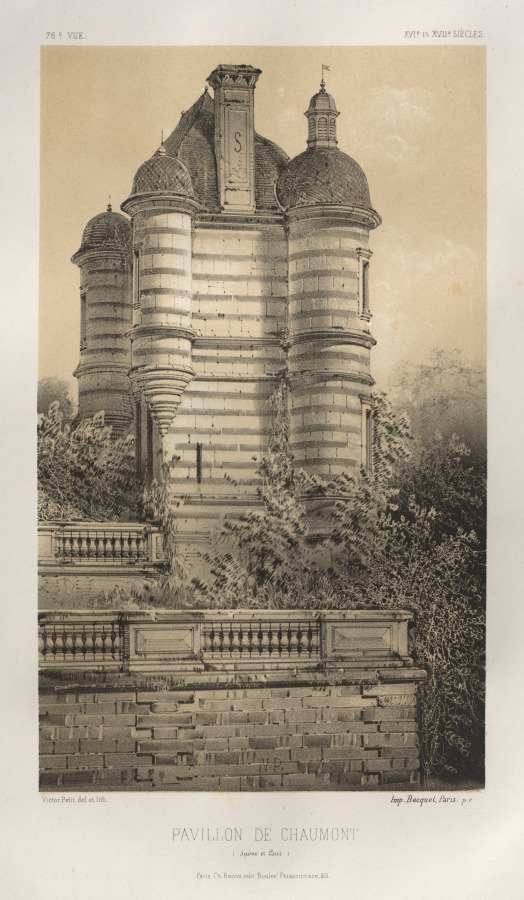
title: Architecture Pittoresque ou Monuments des XVeme. Et XVIeme. Siecles: Chateaux de France des XV et XVI Siecles: Pl. 76, Pavillon De Chaumont (Saône et Loire)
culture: France, 19th century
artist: Victor Petit (French, 1817–1874)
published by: Charles Boivin (publisher and editor); Lith de Godard a Paris (printer)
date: 1860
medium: lithograph with tint stone, from portfolio of 100 lithographs with tint stone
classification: Print